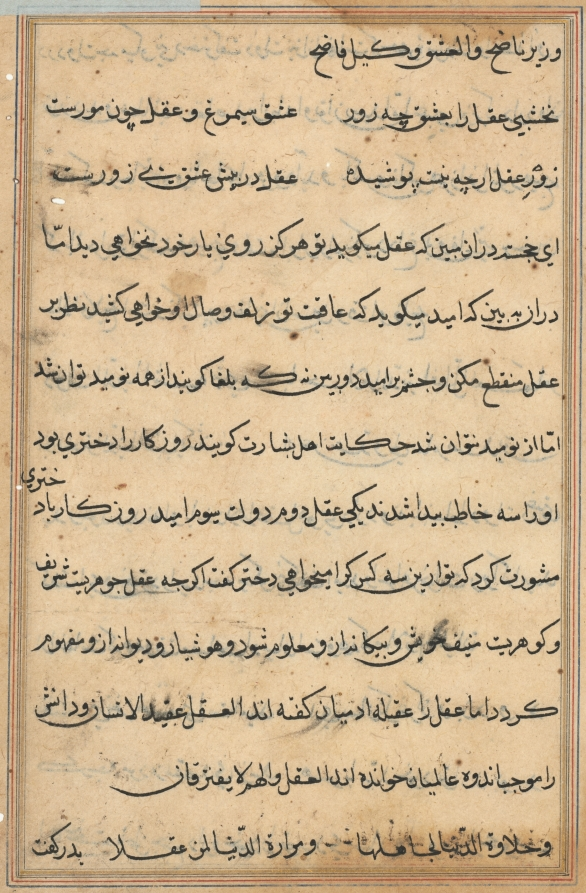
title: Page from Tales of a Parrot (Tuti-nama): text page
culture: Mughal India, court of Akbar (reigned 1556–1605)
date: c. 1560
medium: gum tempera, ink, and gold on paper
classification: Painting